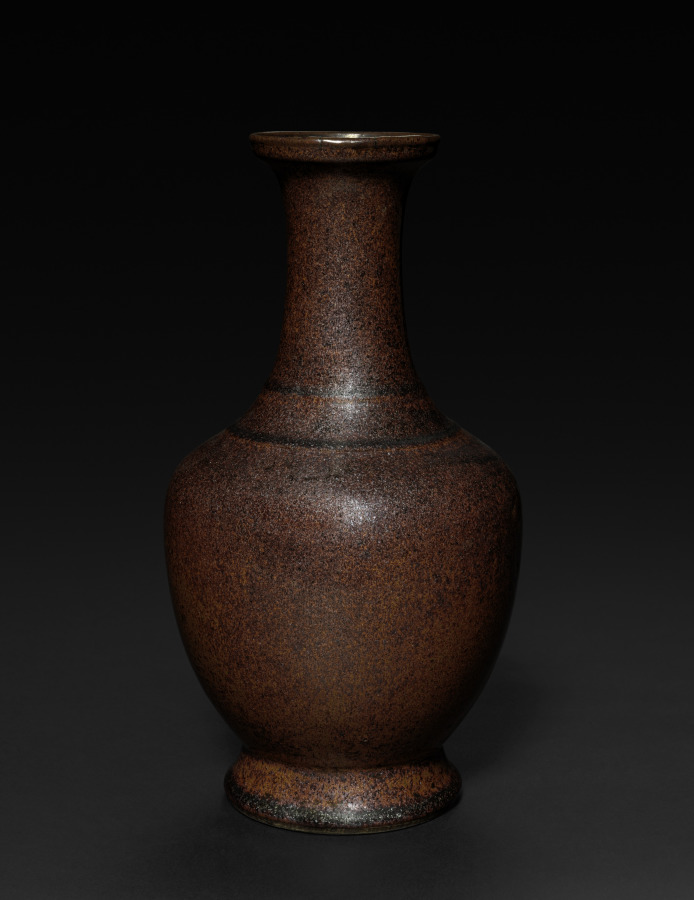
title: Vase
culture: China, Qing dynasty (1644–1911), Qianlong reign (1736–95)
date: 1736–95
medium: porcelain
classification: Ceramic